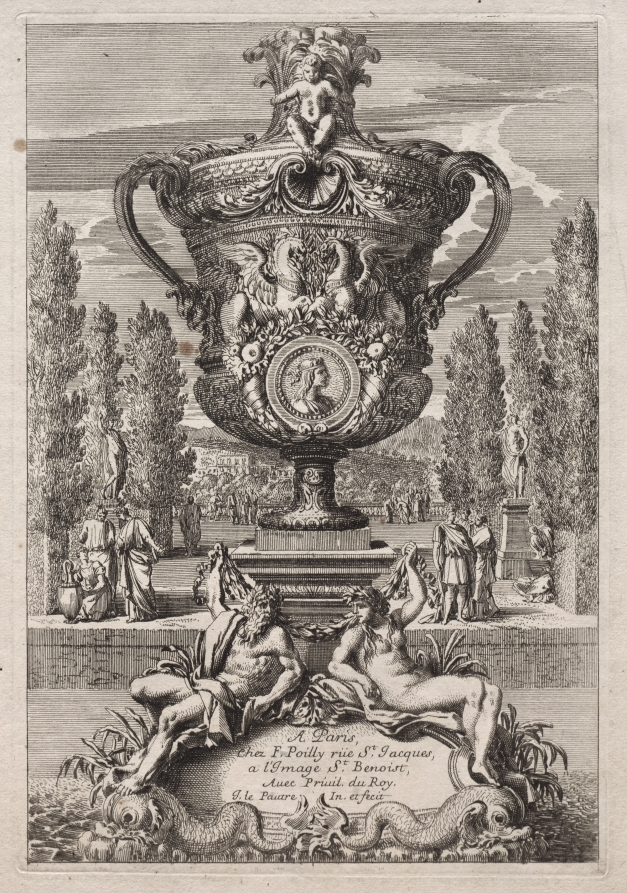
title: Decorative Urn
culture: France, 17th century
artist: Jean Le Pautre (French, 1618–1682)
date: 1600s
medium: etching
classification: Print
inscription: inscribed, within image, in plate: A Paris, / Chez F. Poilly rue St. Jacques, / a l'Image St. Benoist, / Avec Privil. du Roy, / J. le Pautre in. et fecit